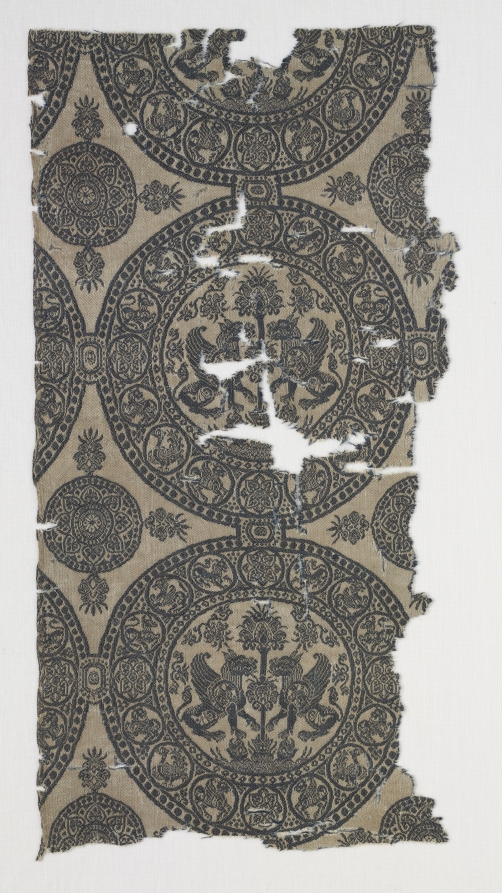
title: Fragments with Griffins in Roundels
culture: Iran or Iraq, in the style of the Seljuq period (1037–1194)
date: before 1966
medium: Silk: lampas weave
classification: Textile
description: This fragment consists of two almost complete roundels and fragments of others. In the roundels are a pair of confronted, winged griffins either side of a "palm" tree. Heavy baroque floral motifs fill the spaces between the main motifs and the roundel frame. The palm grows out of a curious foliate device at the bottom. The roundel frame has pearl borders between which are little circles about 2 cm. in diameter with a series of elegant tiny motifs beginning with a star at the four cardinal points and repeated, left and right, from top to bottom, are a lion, reclining winged ibex, reclining horned animal (possibly a bull), then center star on side, then winged griffin or goat (?), peacock, and lion regardant. In the interspaces are large circular motifs filled with stylized floral motifs and pendant floral motifs growing out in the four angles.